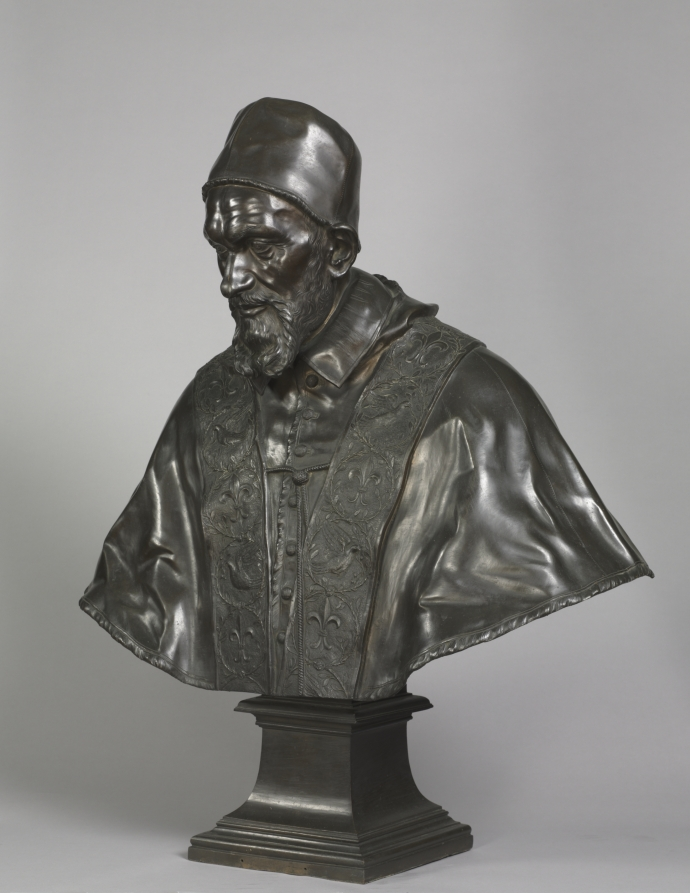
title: Portrait of Pope Innocent X Pamphili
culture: Italy, 17th century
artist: Alessandro Algardi (Italian, 1598–1654)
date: designed 1647–48; cast 1650–1700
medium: bronze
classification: Sculpture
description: Innocent X (Giovanni Battista Pamphili) was pope from 1644 until his death in 1655. Although he was not very interested in the visual arts, he followed tradition and gave several papal commissions for artistic projects. Algardi was the sculptor most frequently called upon by Innocent X. This sensitive portrait captures many details of the pope's costume as well as his intelligent, quiet face.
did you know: The pope's stole features Pamphili family emblems: fleur-de-lis and doves encircled by olive leaves.